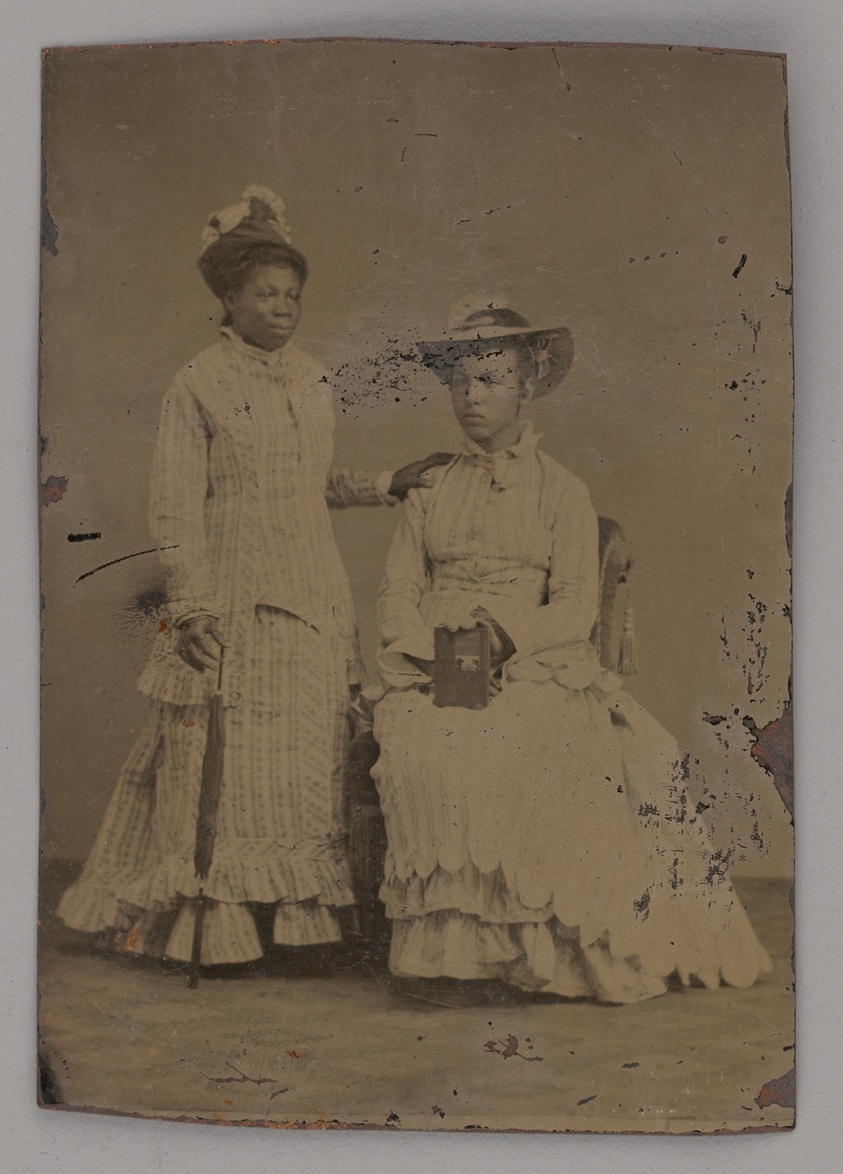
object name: Photograph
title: Untitled (Portrait of One Standing Woman and One Seated Woman)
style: 19th century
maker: Unknown maker; American, 19th century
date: 1860s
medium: Tintype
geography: United States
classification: portrait; tintype; photograph; photographic process; photography; portrait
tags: portraits: African American subject, lundberg collection, African American, portraits, women, hats, portrait